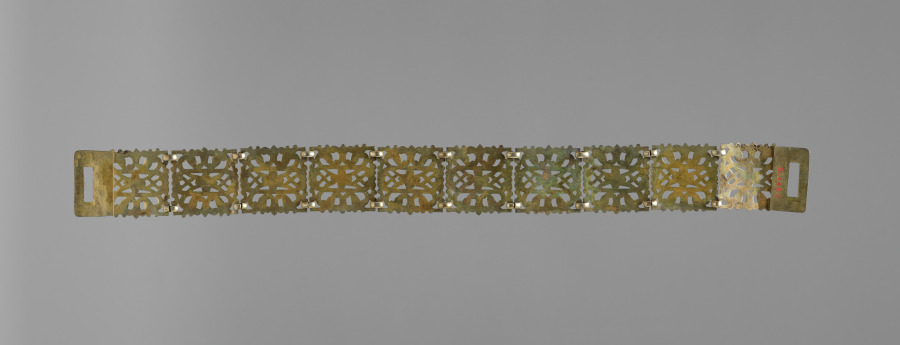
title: Woman's Costume (Metal Belt)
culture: Italy, Sicily, 19th century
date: 1800s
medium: metal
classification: Metalwork